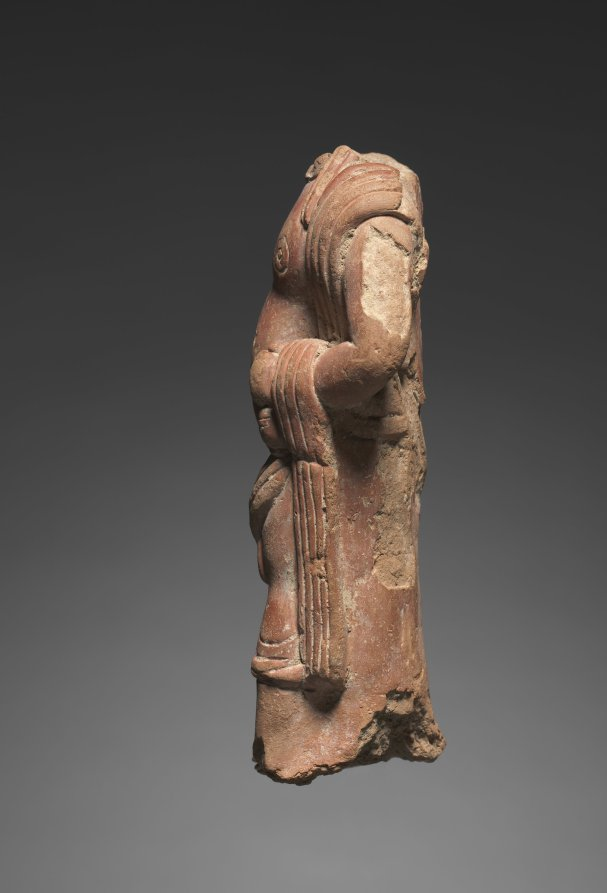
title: Male Fertility Divinity, Possibly Shiva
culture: Northern India, possibly Mathura, Kushan period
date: c. 120–200 CE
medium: terracotta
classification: Sculpture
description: This figure combines an unusual set of attributes. He has long dreadlocks over his shoulders, like an ascetic, and he holds a water pot, like a Brahmin or naga (serpent deity). Also, he seems to carry a sword and dagger like a warrior and is ithyphallic, indicating his virility and fecundity. He may best be identified as a local divinity worshipped for purposes of increasing fertility, but he could also be recognized as an early form of the Hindu god Shiva.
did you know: This sculpture was first made from a mold, then subsequently hand modeled.